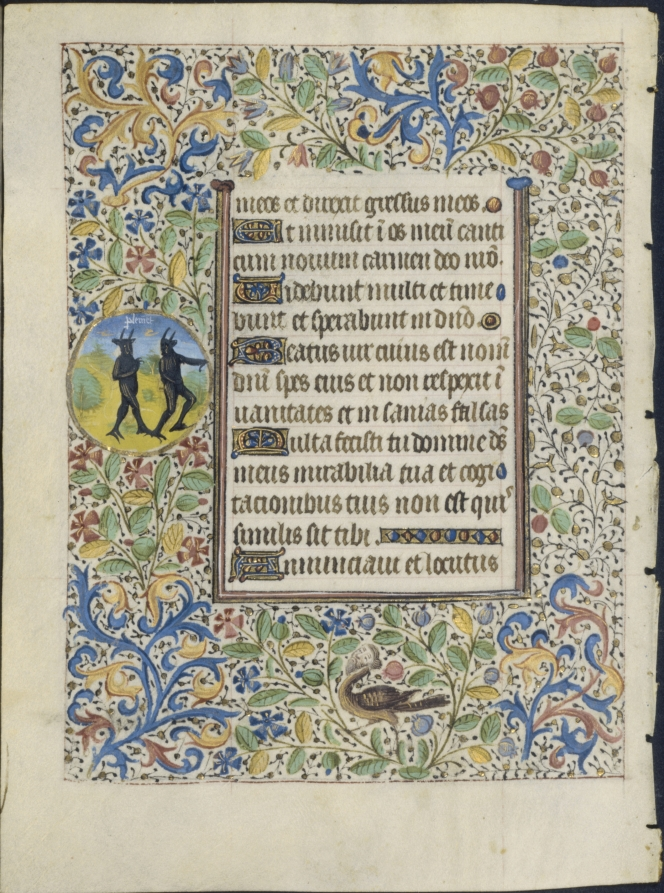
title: Leaf from a Book of Hours: Office of the Dead: Two Devils (verso)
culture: France, Paris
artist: circle of Coëtivy Master (French)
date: c. 1460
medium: ink, tempera and gold on vellum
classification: Manuscript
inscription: …meos: et direxit gressus meos. Et inmisit in os meum canti- Cum novum carmen Deo nostro. Videbunt multi et time- Bunt et sperabunt in Domino. Beautus vir cuius est nomen Domini spes ipsius et non respexit in Vanitates et insanias falsas. Multa fecisti tu Domine Deus meus mirabilia tua et cofi- tationibus tuis non est qui similissit tibi. Adnuntiavi et locutus…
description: As a time-saving device, illuminators in the 1450s and later would often paint identical borders on both sides of a leaf. The motifs would be drawn on one side and then traced on the other by holding the leaf against a window. Both sides of this leaf are therefore mirror images, containing elaborate floral borders, gold-leaf ivy vines, sprays of flowers or fruit, and a grotesque, in this case a bird with the head of a man. Also included is a roundel featuring two devils. This leaf is from a dismantled manuscript that included numerous painted roundels relating to the lives of Saint Catherine of Alexandria and the more obscure Saint Alexis.